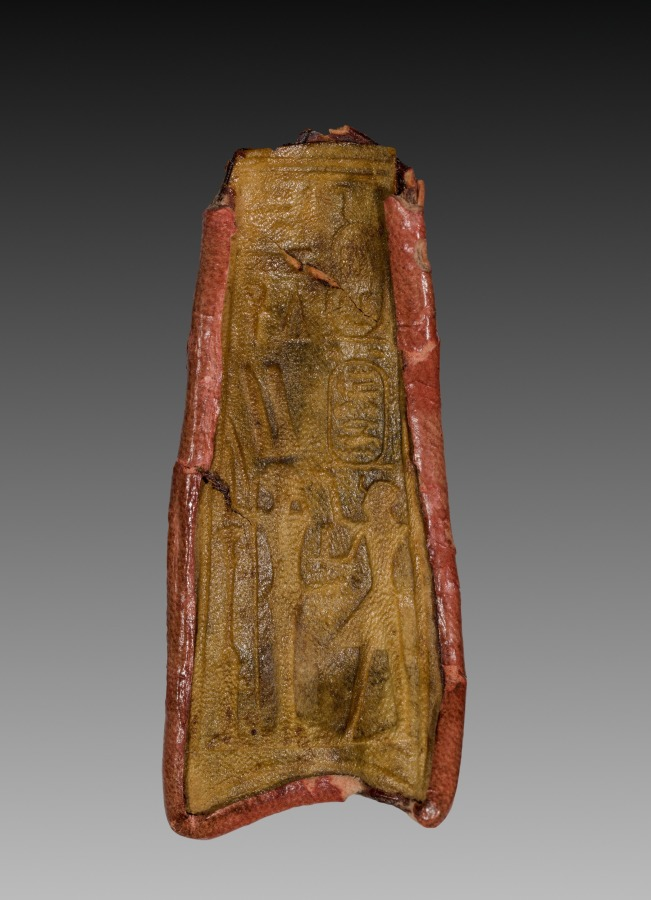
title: Mummy Band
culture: Egypt, Third Intermediate (1069–715 BCE), Dynasty 22, reign of Osorkon I (992–887 BCE)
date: 945–715 BCE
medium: stained leather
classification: Funerary Equipment